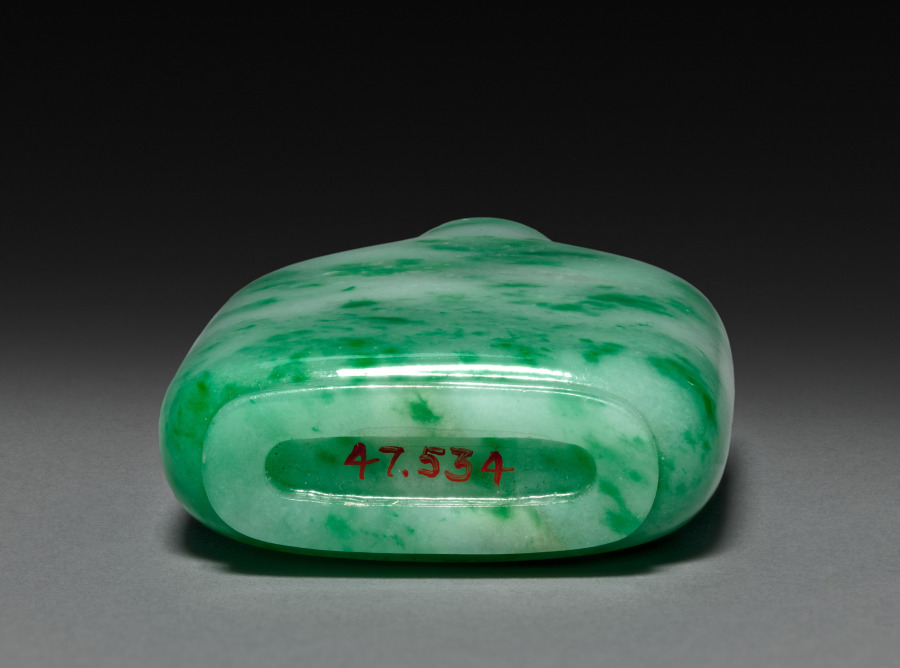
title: Snuff Bottle with Stopper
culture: China, Qing dynasty (1644-1911)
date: 1800s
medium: jade and rose quartz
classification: Jade